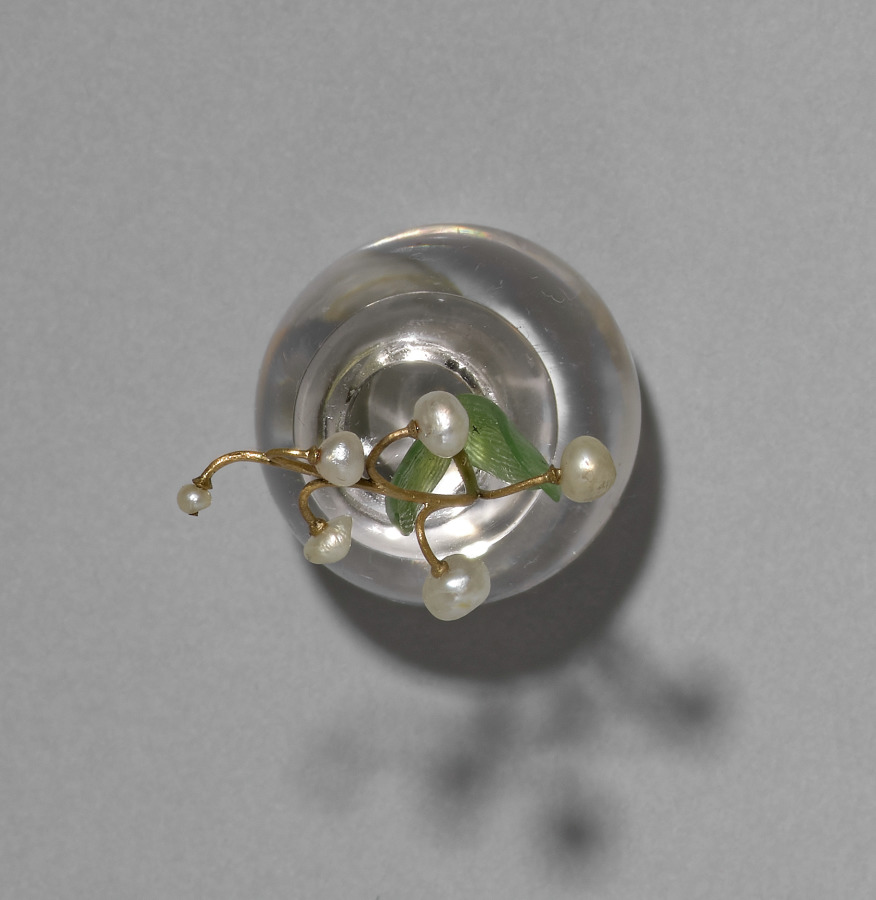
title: Flower Study of a Miniature Lily of the Valley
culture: Russia, St. Petersburg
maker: House of Fabergé (Russian, 1842–1918)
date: c. 1885–1915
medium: pearls, jade, rock crystal, gold, diamonds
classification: Miscellaneous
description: A small, carved rock crystal vase holds this lily of the valley study. The pearls, forming the flower’s buds, are drilled and attached to the remarkably slim gold stem. The hand-cut nephrite (jade) leaves enhance the naturalistic aura of the flower. Fabergé’s inspiration for his flower studies is said to have come from the floral brooches of precious stones that were made in the 1700s for Catherine the Great as well as from the Japanese art of flower arranging, known as ikebana.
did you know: Small and delicate, Fabergé’s flower studies were given as intimate gifts to friends by Tsarina Alexandra and others in the court. She kept them in all the palaces as a reminder of spring during the harsh Russian winters.